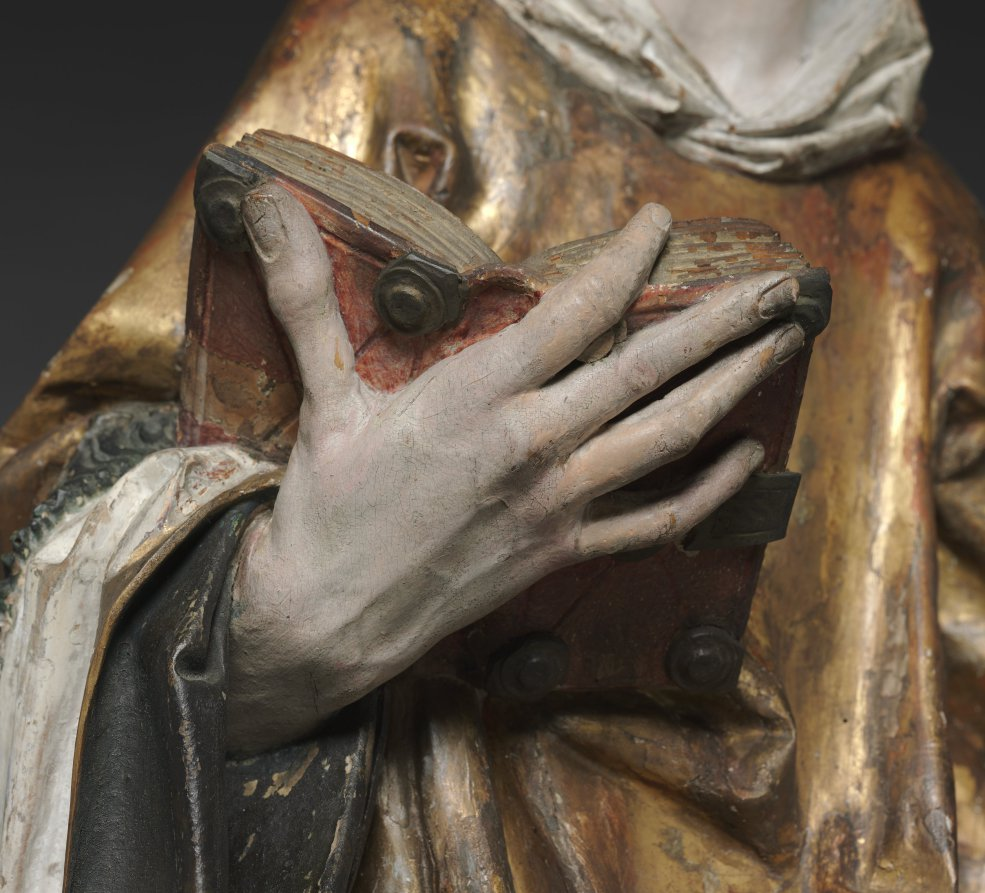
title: Saint Lawrence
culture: Germany, Würzburg, 16th century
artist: Tilman Riemenschneider (German, active Würzburg, c. 1460–1531)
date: 1502–8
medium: lindenwood with polychromy and gilding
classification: Sculpture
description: This sculpture, along with that of Saint Stephen (1959.43), and two female saints preserved in Frankfurt (Historisches Museum), are believed to be the remaining fragments of a large altarpiece carved by Riemenschneider for the Dominican convent in Rothenburg in Franconia (demolished in 1813). Saints Stephen and Lawrence both wear the dalmatic to indicate their status as deacons in the early church. Each holds a symbol of his martyrdom; here, Saint Lawrence holds a grill to indicate his death by burning. Late Gothic Style Art in Germany through the early 1500s remained firmly anchored in the late Gothic style with its associated interests in realism. Riemenschneider was one of the most prolific and versatile sculptors of this style, a recognized master in both stone and wood. His flourishing workshop employed as many as 40 apprentices in sculpting, woodcarving, and painting. His sculptures are noted for the dreamy, melancholy, and introspective quality in their expressions, as well as their remarkable attention to detail.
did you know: Before Riemenschneider finally settled in Würzburg, Germany, in 1484, he traveled to Strasbourg and Colmar, where he became acquainted with the works of the engraver Martin Schongauer.